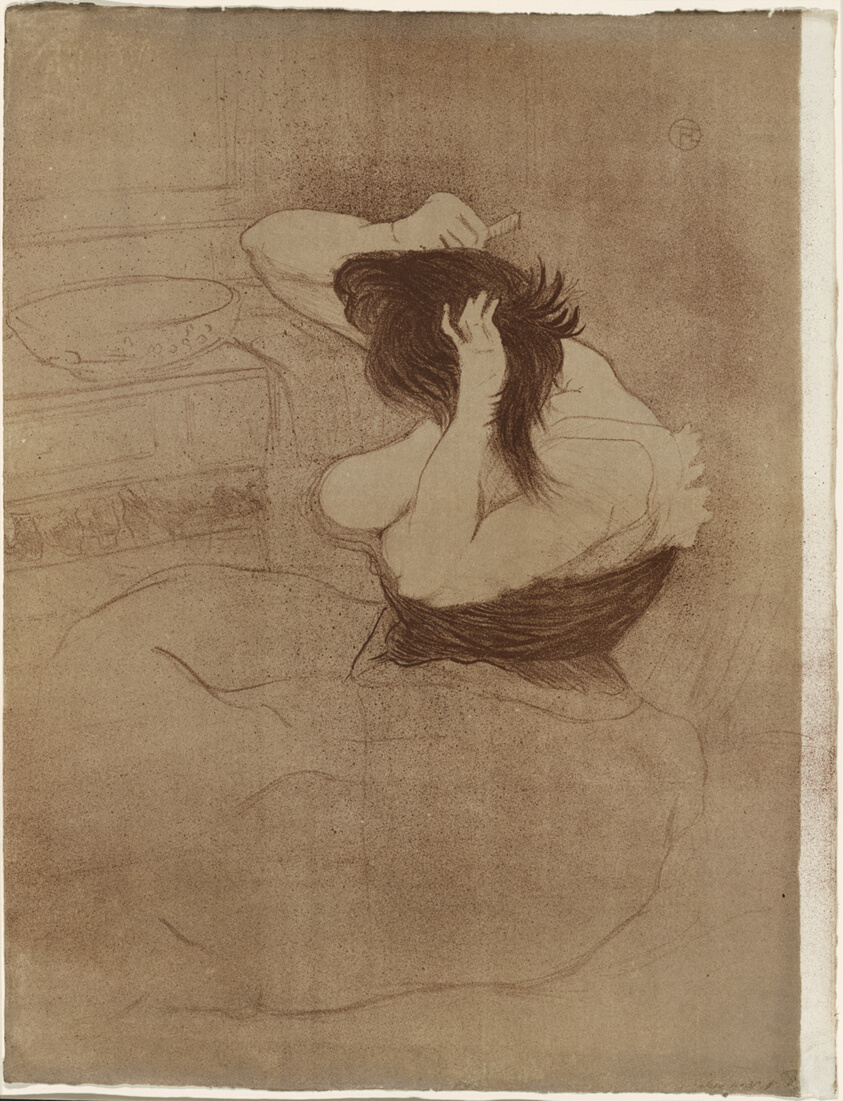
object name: Print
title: Woman Combing Her Hair—La Coiffure, plate seven from Elles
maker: Henri de Toulouse-Lautrec (French, 1864-1901); published by Gustave Pellet (French, 1859-1919); probably printed by Auguste Clot (French, 1858-1936)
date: 1896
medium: Color lithograph on ivory wove paper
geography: France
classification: lithograph; print; prints and drawing